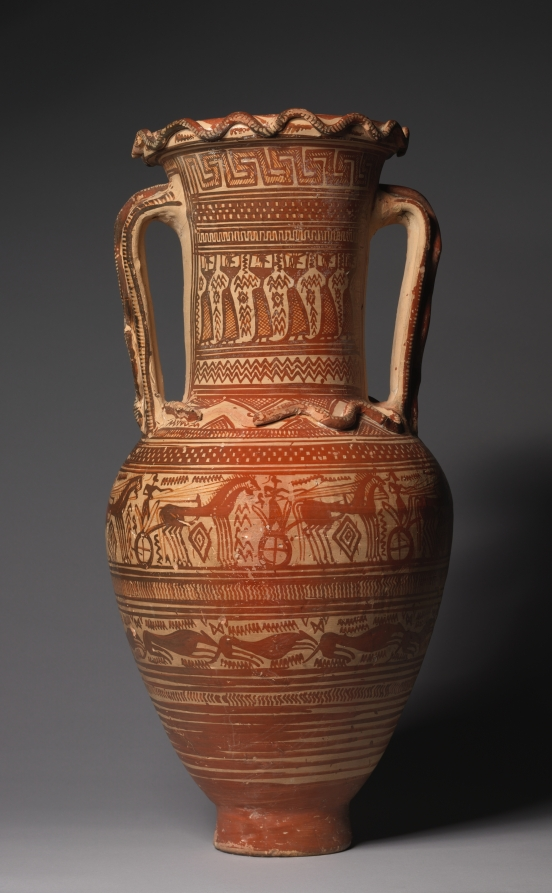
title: Geometric Neck-Handled Amphora (Storage Vessel): Prothesis (Laying out of Corpse), Mourners, Chariots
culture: Greek, Attic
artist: attributed to Workshop of Athens 894 (Greek, Attic, Late Geometric llb)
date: c. 720–700 BCE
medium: ceramic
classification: Ceramic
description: This neck-amphora bears multiple forms of decoration related to funerary ritual. On the neck panels, mourners beat their heads or tear out their hair. Some surround a bier, a platform where the body of the deceased lies beneath a checkered cloth. Further down, a procession of two-horse chariots moves around the vase, whether headed to the cemetery or the battlefield. The snakes applied to the handles, neck, and rim may all allude to the underworld.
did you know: The better-preserved side of this vase is actually its reverse.